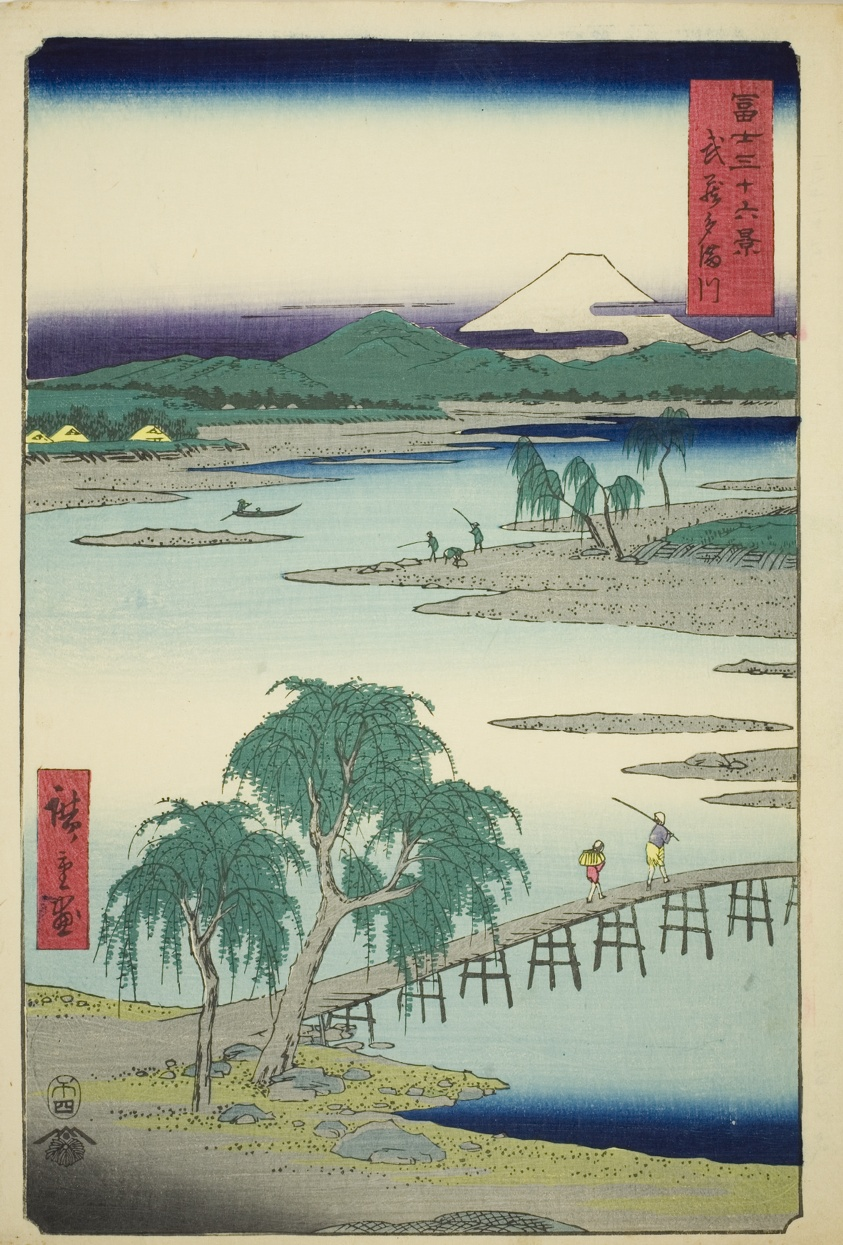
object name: Print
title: Tama River in Musashi Province (Musashi Tamagawa), from the series "Thirty-six Views of Mount Fuji (Fuji sanjurokkei)"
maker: Utagawa Hiroshige 歌川 広重; Japanese, 1797-1858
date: 1858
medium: Color woodblock print; oban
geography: Japan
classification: print; asian art